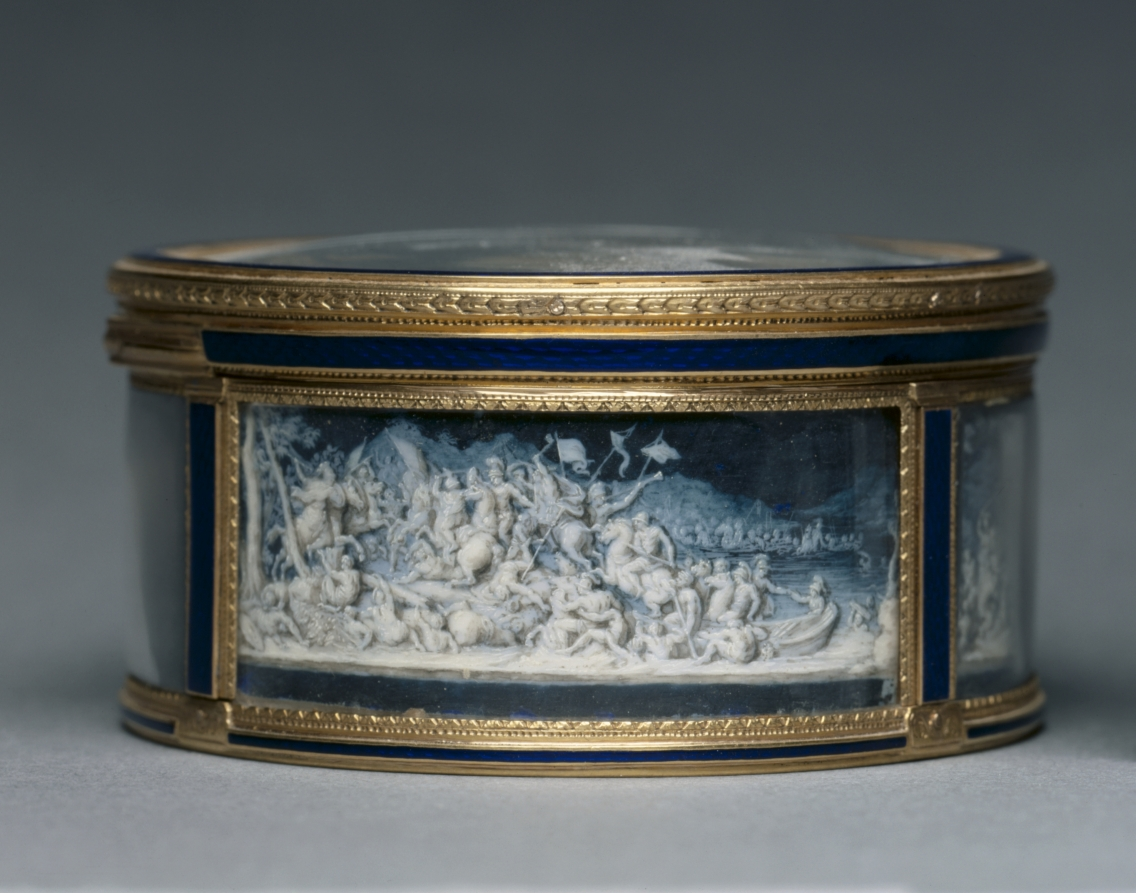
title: Snuff Box (Tabatière)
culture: France, 18th century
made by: Pierre Marie Gault De Saint-Germain (French, 1754–1842)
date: 1779–80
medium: gold and enamel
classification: Miscellaneous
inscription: [Warden's mark for Paris, 1779-1780, inside bottom; inside cover]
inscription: [Illegible maker's mark, inside bottom; inside cover]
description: Decorated with images derived from ancient Greek and Roman history in the style of cameos, intricately carved gemstones, this box evokes the rising neoclassical imagery in France. The scenes on the box recount several key events in the life of Alexander the Great. The enameled works were inspired by a series of prints by Sébastien Leclerc which drew from a series of paintings by Charles Le Brun.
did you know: The original series painted by Charles Le Brun, The Battles of Alexander (Les Batailles d’Alexandre) (1600s), was commissioned by King Louis XIV of France.